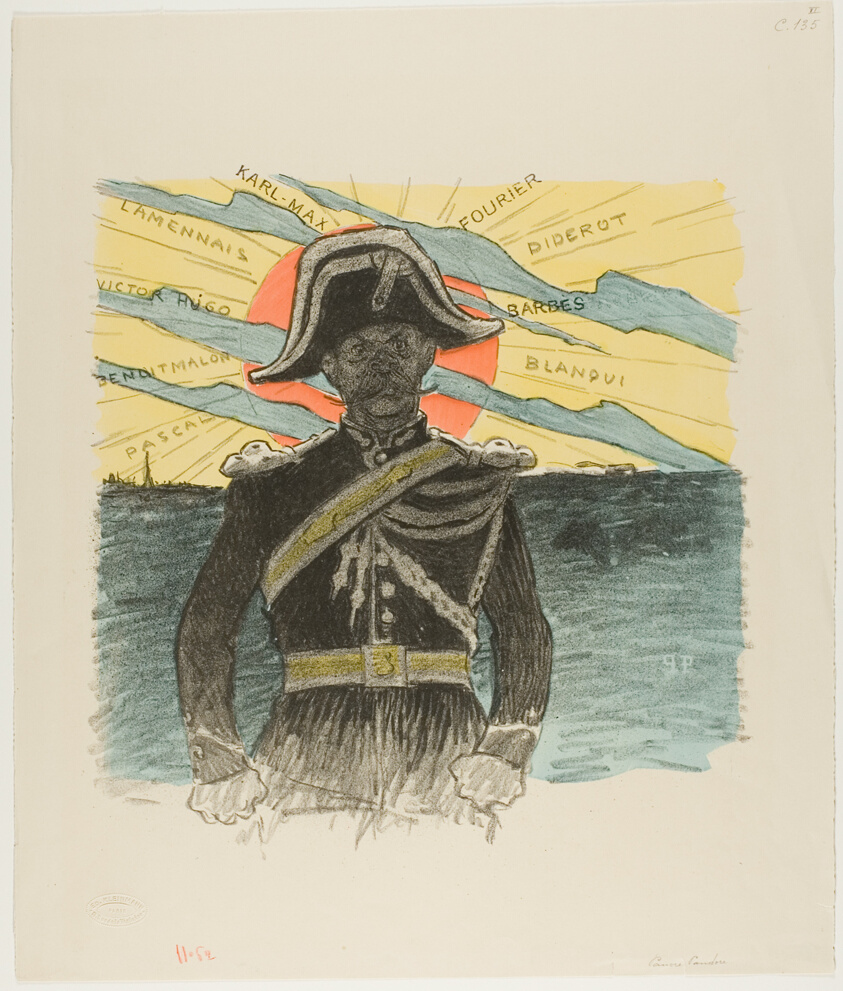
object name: Print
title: Poor Pandora!...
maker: Théophile-Alexandre Steinlen; French, born Switzerland, 1859-1923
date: January 1894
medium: Lithograph in black with hand-stenciled color (pochoir) in blue, yellow, and orange on cream wove paper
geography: France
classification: lithograph; print; prints and drawing